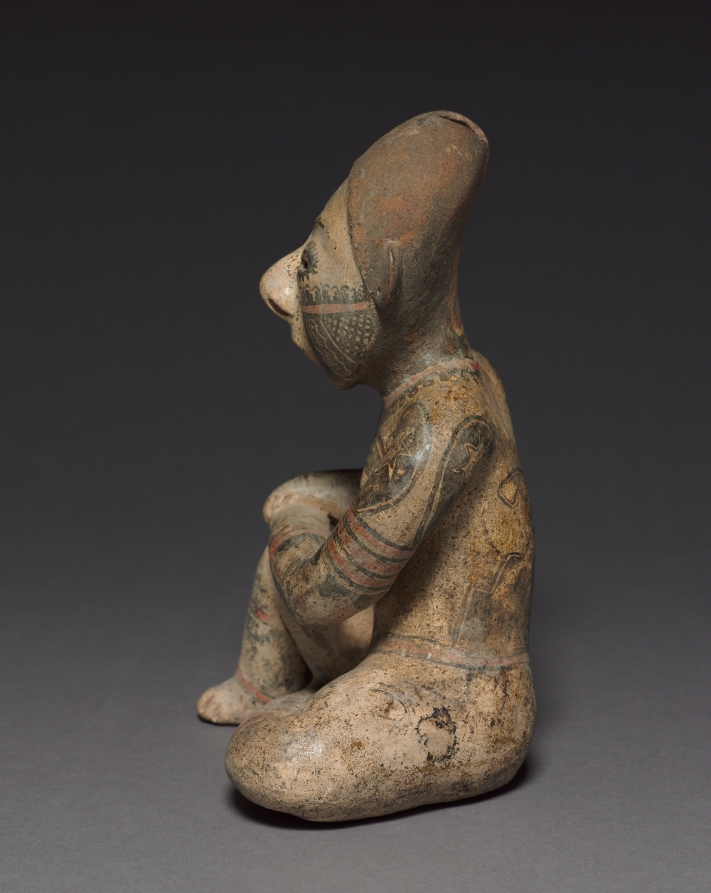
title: Seated Female Figure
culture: Mexico, Nayarit, Chinesco Style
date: c. 100 BCE–300 CE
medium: earthenware with burnished, colored slips and resist patterning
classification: Sculpture